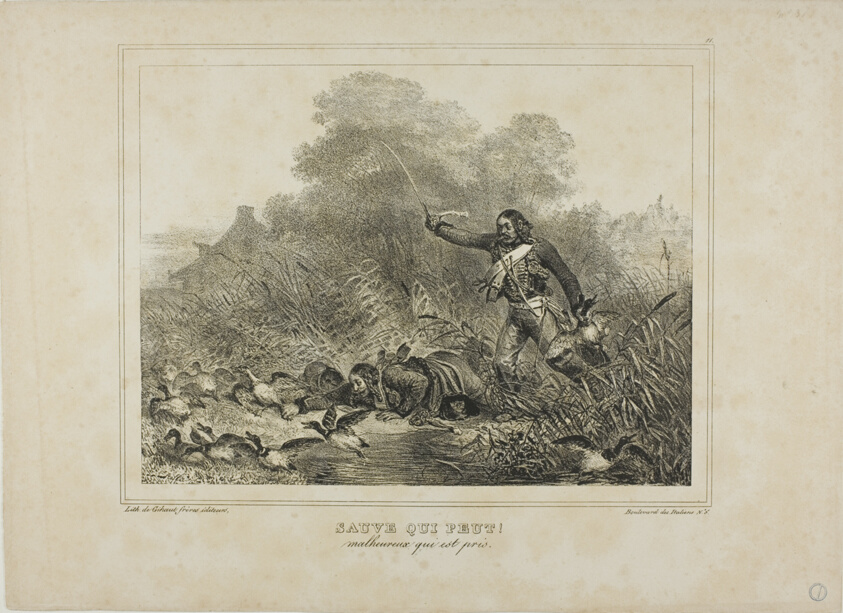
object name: Print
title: Every Man for Himself!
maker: Denis Auguste Marie Raffet (French, 1804-1860); printed by Chez Gihaut Frères (French, 19th century)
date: 1833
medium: Lithograph in black on tan wove paper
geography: France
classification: lithograph; print; prints and drawing